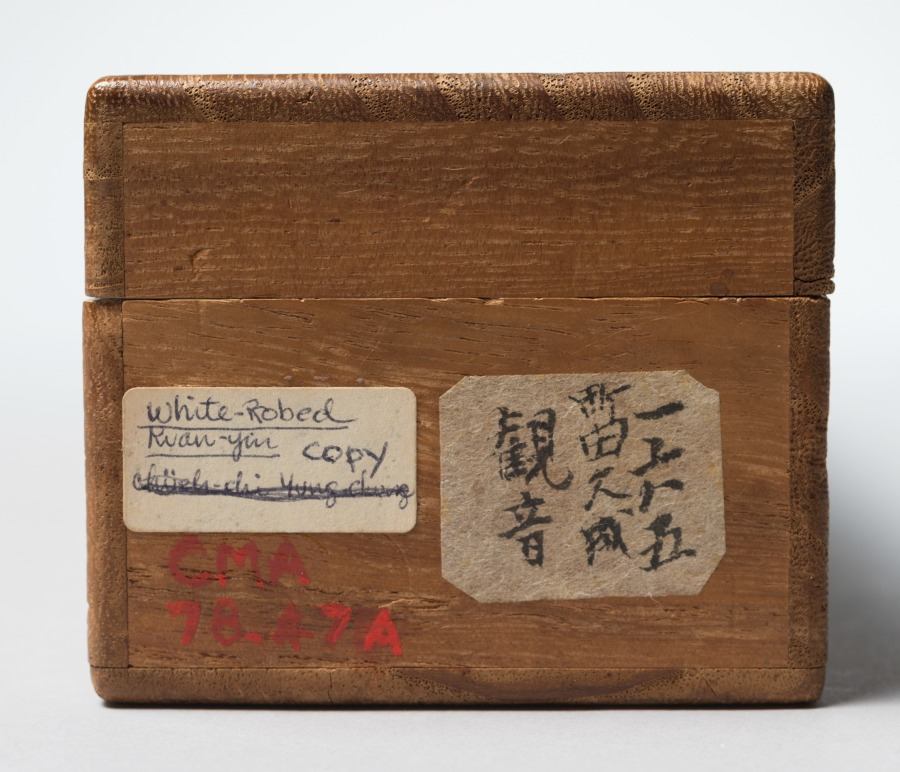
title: White-Robed Guanyin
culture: China, Yuan dynasty (1271-1368)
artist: copy after Jueji Yongzhong (Chinese, active around 1300)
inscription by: Zhongfeng Mingben (Chinese, 1263–1323)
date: late 1200s–early 1300s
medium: hanging scroll; ink and gold on silk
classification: Painting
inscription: Inscription: one of the 84,000 painted by the priest Insei.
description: The original model for this ink drawing of Guanyin, the bodhisattva of infinite compassion (Avalokiteshvara in Sanskrit), is CMA 1978.47.1. This drawing is a later copy with the same image of the White-Robed Guanyin, but in reverse. The inscription above reads: one of the 84,000 painted by the priest Insei. The inscription seems to indicate that the Japanese priest Insei repeatedly copied the image of the bodhisattva in an act of piety and to accumulate merit, as is promised in the Lotus Sutra for anyone who paints images of the Buddha, they “will achieve the Buddha path.” The priest’s name and seal need further study and identification.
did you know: The bodhisattva's face and halo were delicately painted in gold.